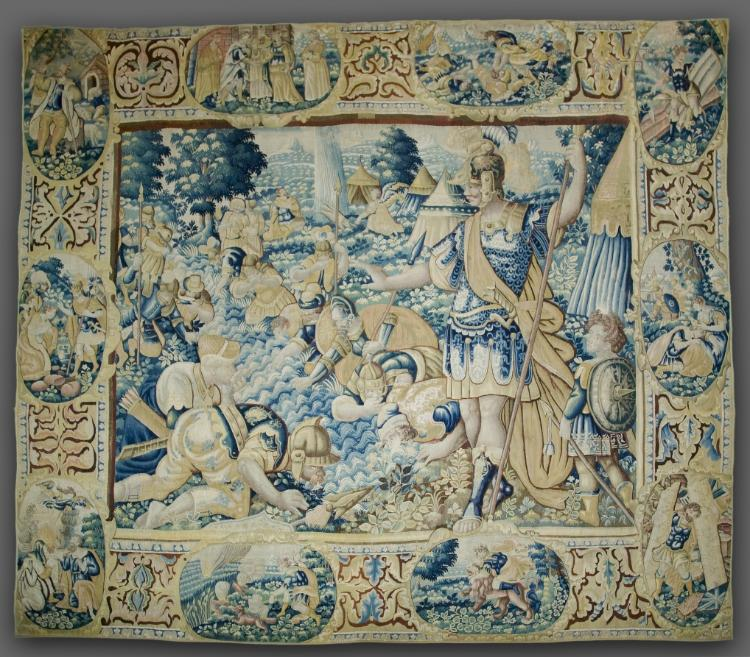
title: Gideon Selecting his Army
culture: Flanders, late 16th century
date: late 1500s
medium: tapestry weave: wool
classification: Tapestry